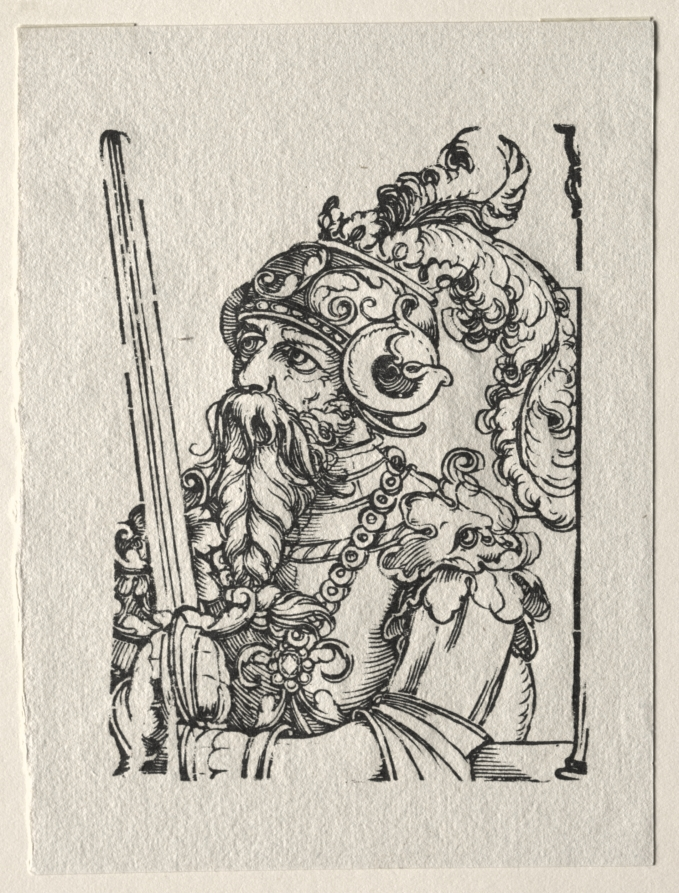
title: Tyrants of the Old Testament: Sennacherib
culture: Germany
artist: Georg Pencz (German, c. 1500–1550)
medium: woodcut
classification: Print